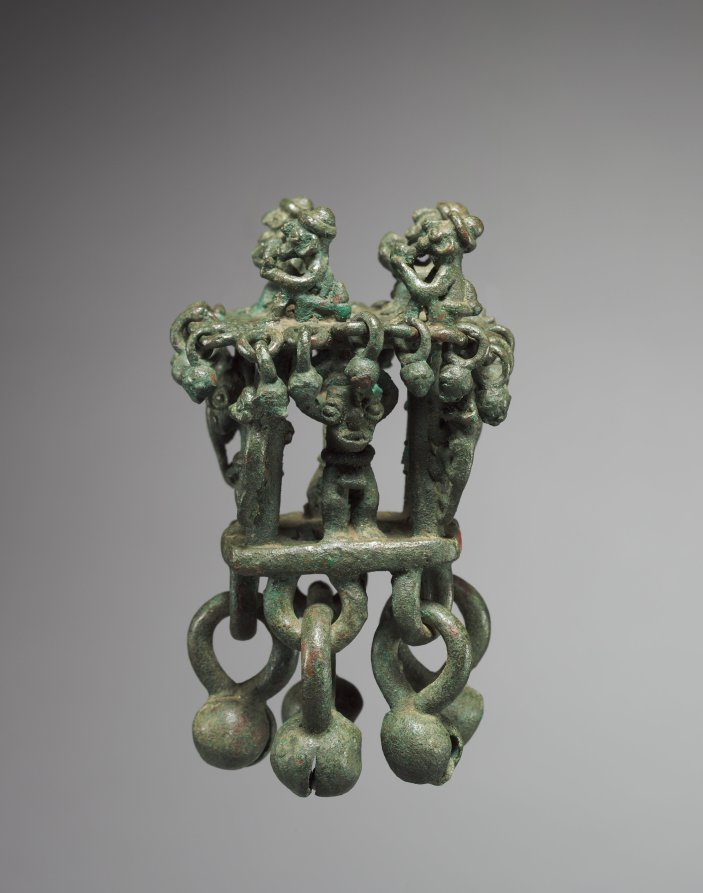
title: Finial of a Staff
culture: Peru, North Coast, Chimú style (900-1470)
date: Chimú style (900–1470)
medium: cast copper alloy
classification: Metalwork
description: Look carefully at this scepter top; the corrosion obscures details, but the scene is interesting.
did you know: Many ancient Andean artworks incorporate the element of sound.